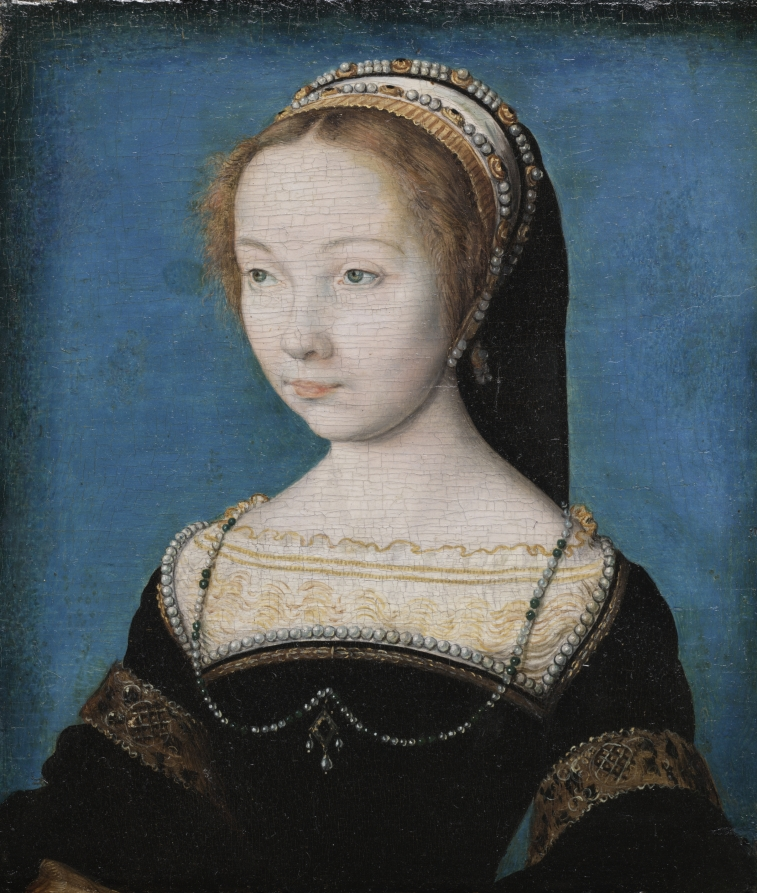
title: Portrait of a Woman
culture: Netherlandish, active France, 16th century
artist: Corneille de Lyon (Netherlandish, 1500/10–1574)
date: c. 1540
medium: oil on wood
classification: Painting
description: Corneille de Lyon worked both for the French court and wealthy merchants. His distinctive northern style stood in contrast to the taste for Italian Renaissance painting and connected closely to portrait miniatures and manuscript painting. Recent conservation treatment has restored the smooth, enamel-like background and the meticulous rendering of detail.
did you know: Gold leaf was applied to the details of the sitter’s headdress and embroidery on her dress.